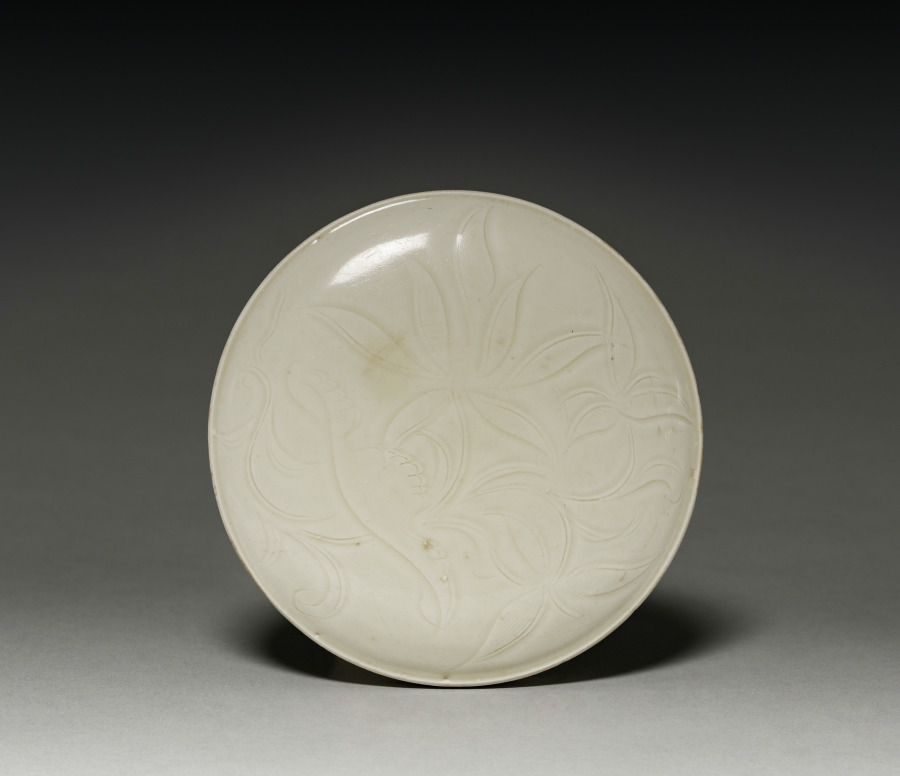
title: Covered Box (lid)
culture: China, Hebei province, Quyang, Northern Song dynasty (960-1127) to Jin dynasty (1115-1234)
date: 1100s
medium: cream-glazed porcelain with incised decoration, Ding ware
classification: Ceramic